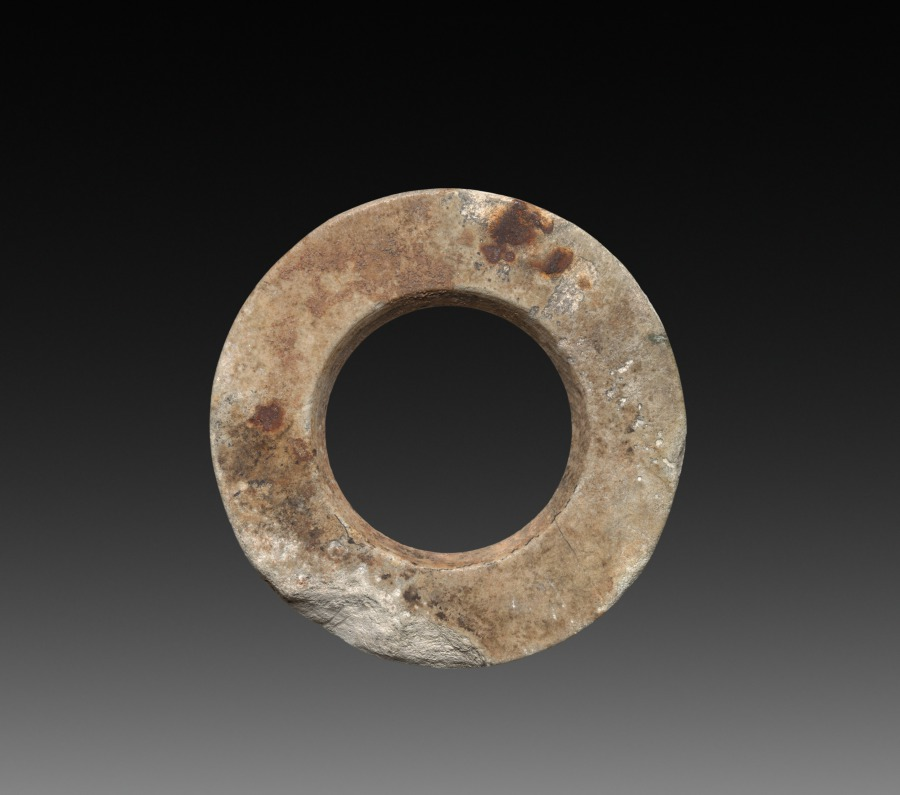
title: Ring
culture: China, Han dynasty (202 BCE–220 CE) or later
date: 200 CE or later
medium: stone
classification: Jewelry